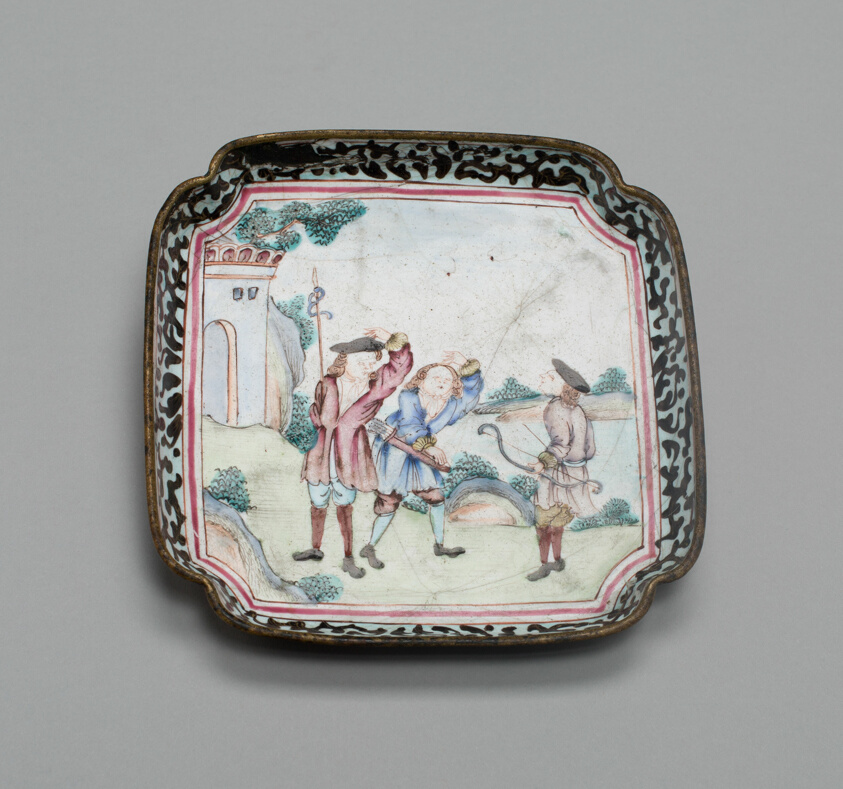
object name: Metalwork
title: Tray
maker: China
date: 1730/70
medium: Polychrome enamel on copper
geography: China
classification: tray; enamel; european decorative arts; metalwork